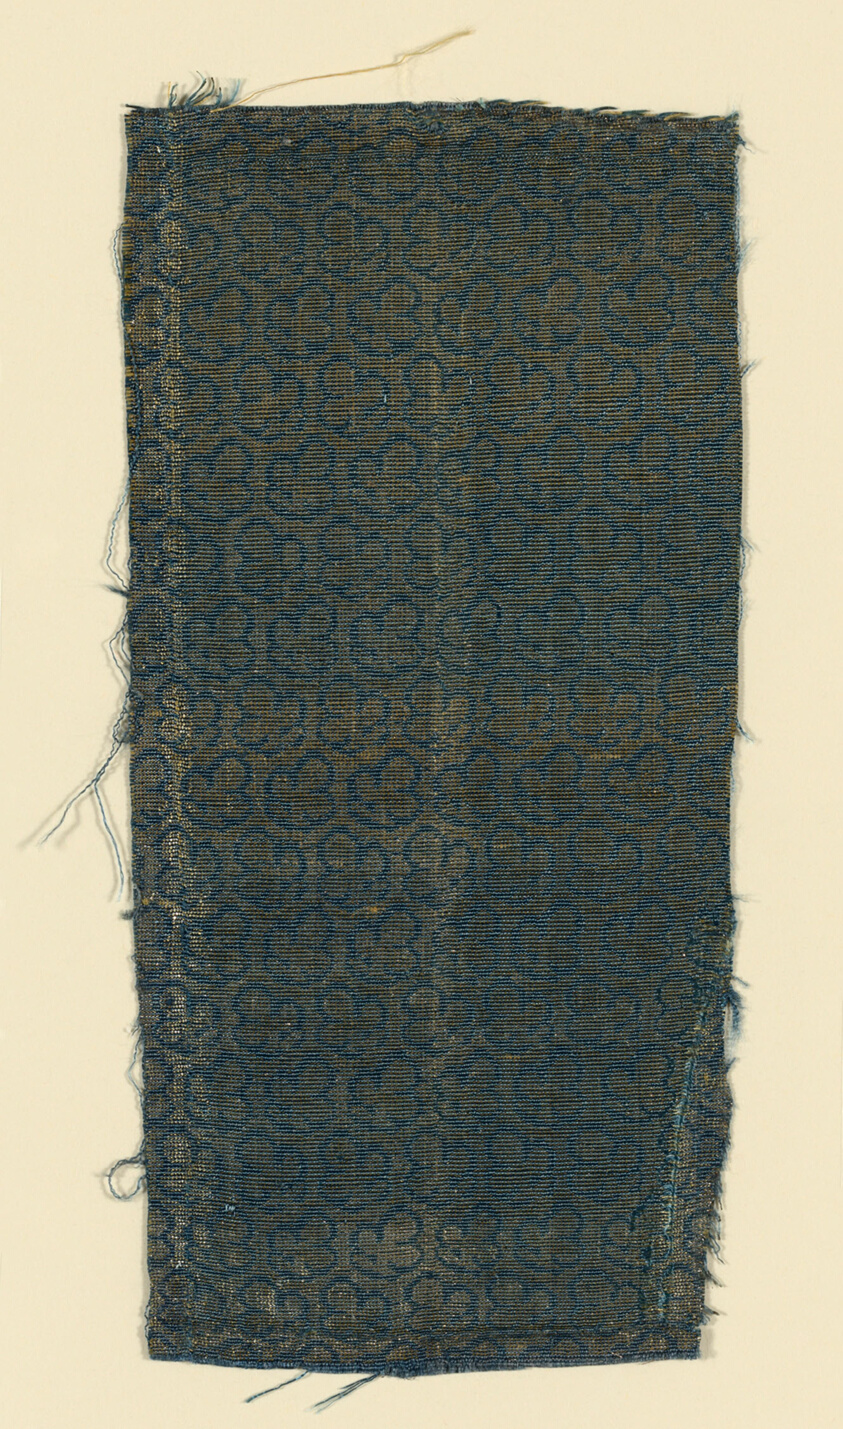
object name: Textile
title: Fragment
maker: Italy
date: Mid–17th century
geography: Italy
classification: textile; weaving